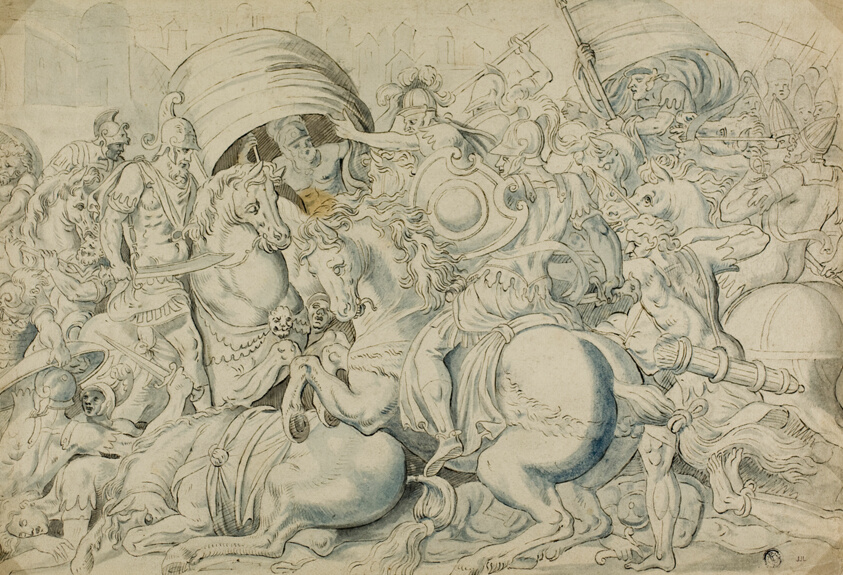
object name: Drawing and Watercolor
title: Battle before Troy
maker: After Luca Penni; Italian, 1500/05-1557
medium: Pen and brown ink, and brush and blue and gray wash, on cream laid paper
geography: Italy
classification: pen and ink drawings; drawings (visual works); prints and drawing